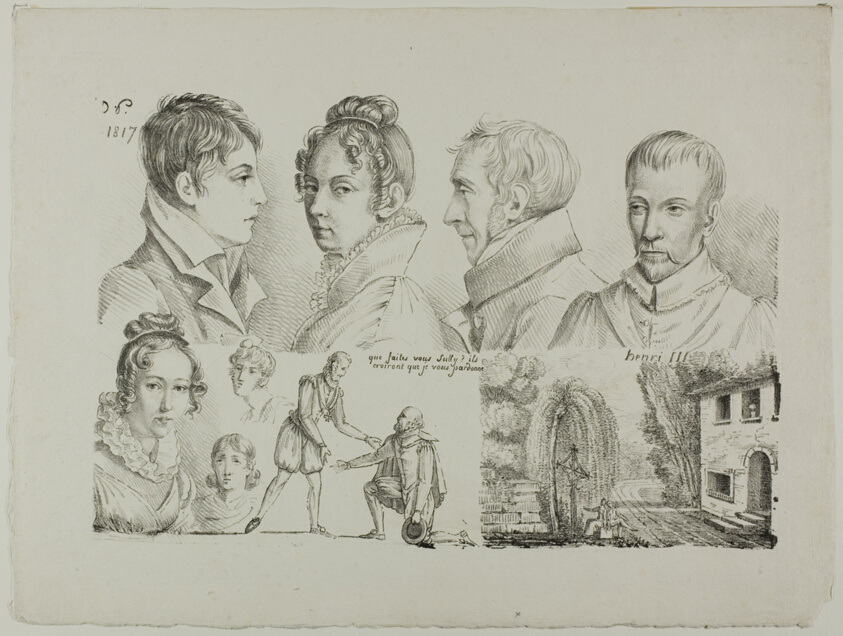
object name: Print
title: Sketches of Seven Heads, etc.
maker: Monogrammist B.D.P. (probably French, 18th-19th centuries)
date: 1817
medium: Lithograph in black on ivory laid paper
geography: France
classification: lithograph; print; prints and drawing